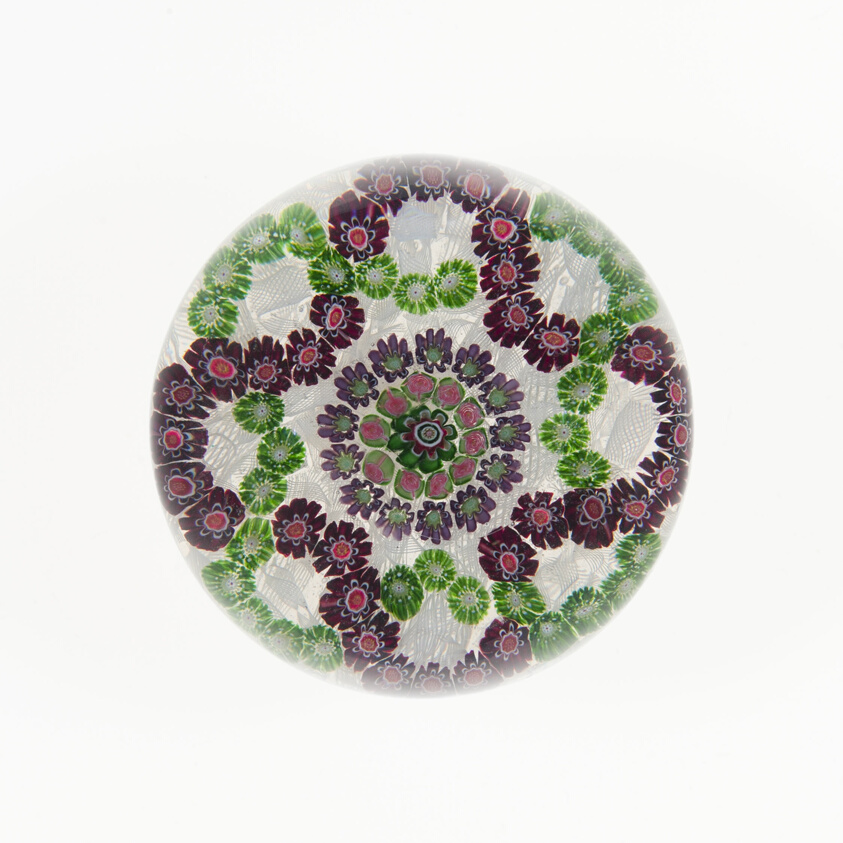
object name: Glass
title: Paperweight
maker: Clichy Glassworks (Cristalleries de Clichy); Clichy, France, 1837-1885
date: 19th century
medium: Glass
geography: Clichy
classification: paperweight; glass